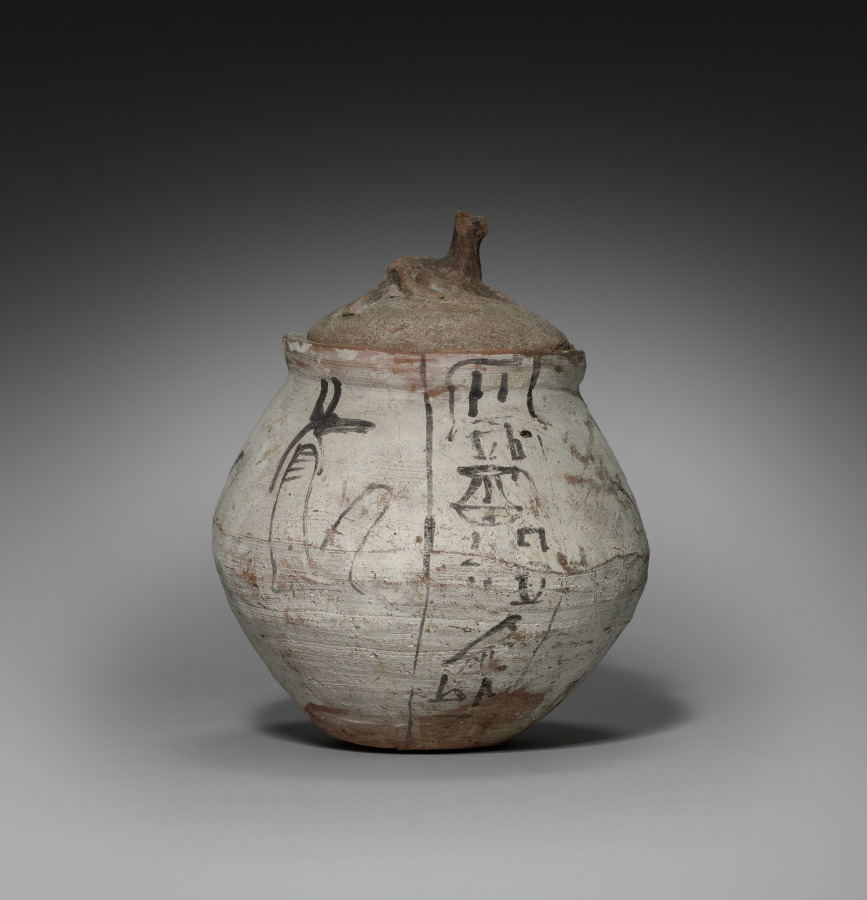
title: Shawabty Jar with Lid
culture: Egypt, New Kingdom (1540–1069 BCE), Dynasties 19–20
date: 1295–1069 BCE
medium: Nile silt ware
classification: Funerary Equipment